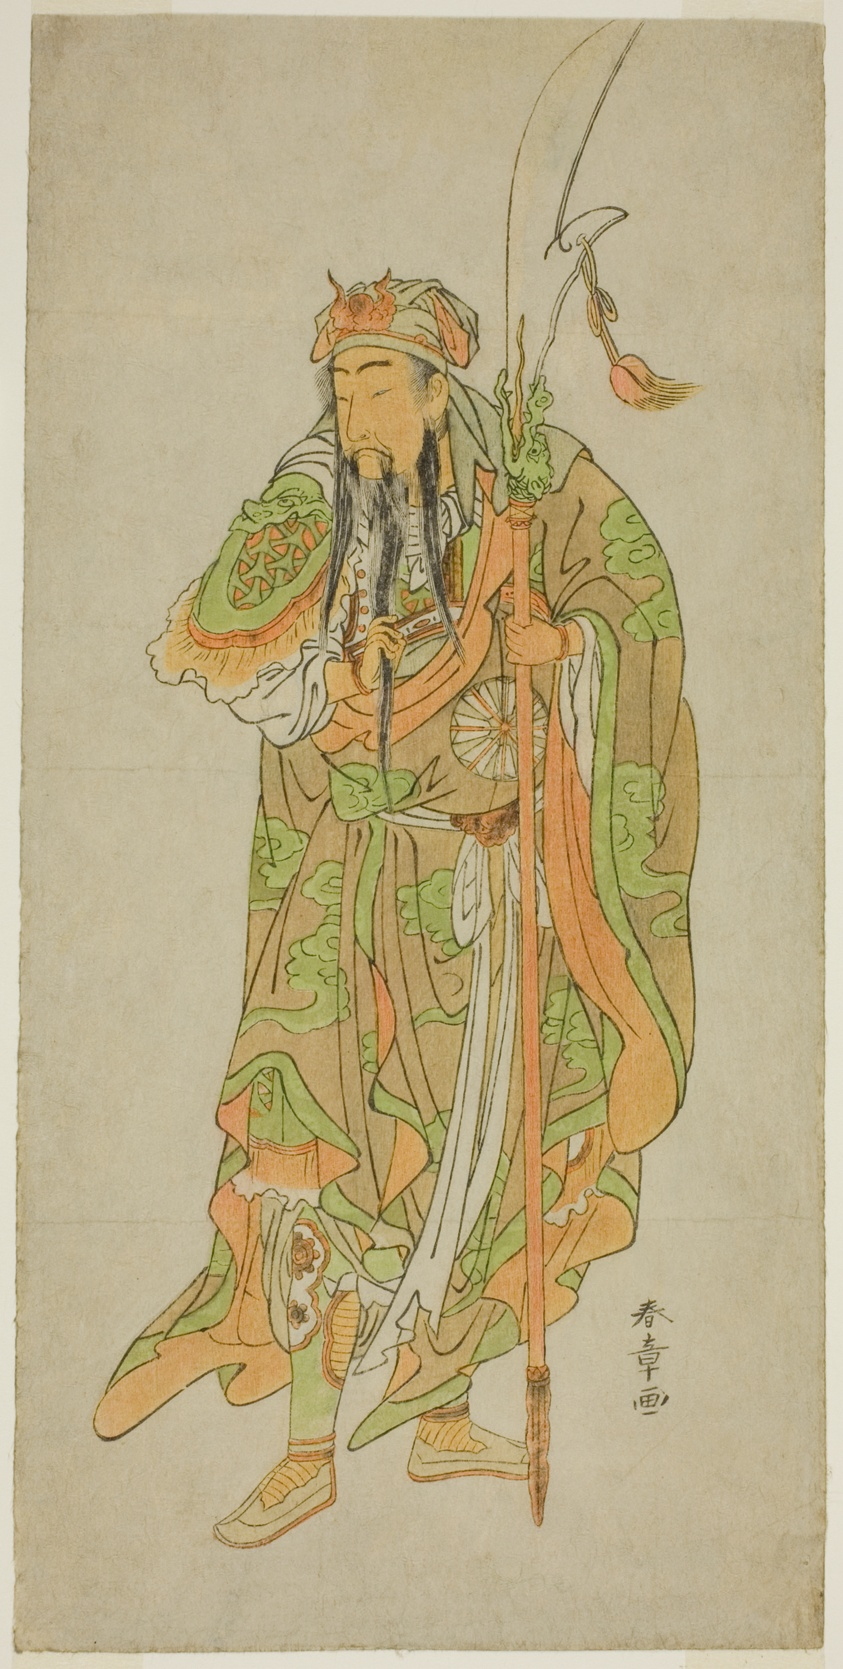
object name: Print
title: The Actor Nakamura Tomijuro I as the Chinese Hero Kan'u in the Play Hatsu Akebono Niwatori Soga, Performed at the Morita Theater in the First Month, 1772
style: Japanese (culture or style)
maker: Katsukawa Shunsho 勝川 春章; Japanese, 1726-1792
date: c. 1772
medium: Color woodblock print; hosoban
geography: Japan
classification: woodblock print; print; asian art